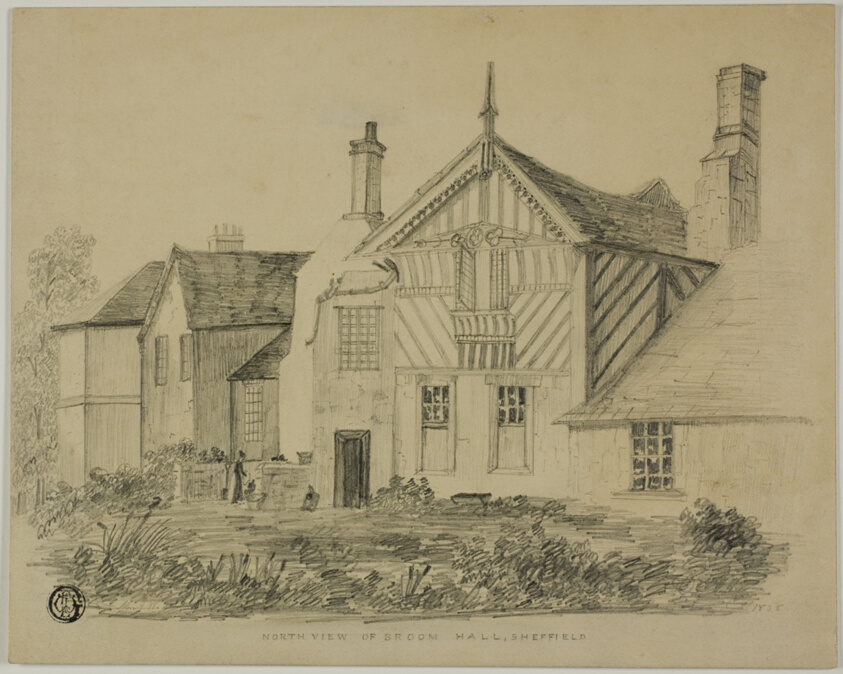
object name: Drawing and Watercolor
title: North View of Broom Hall, Sheffield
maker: Unknown Artist; British, n.d.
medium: Graphite on tan wove card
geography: United Kingdom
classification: graphite; drawings (visual works); prints and drawing